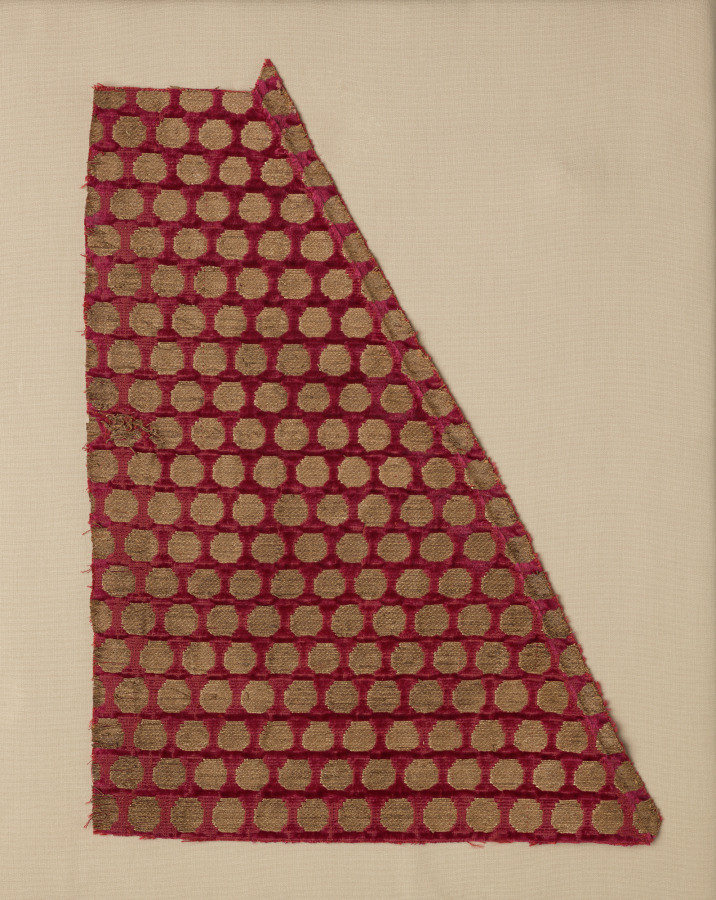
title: Velvet Fragment in Two Pieces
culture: Iran or Iraq, 14th century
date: 1300s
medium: velvet, lancé, silk and Cyprian gold around silk core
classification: Velvet